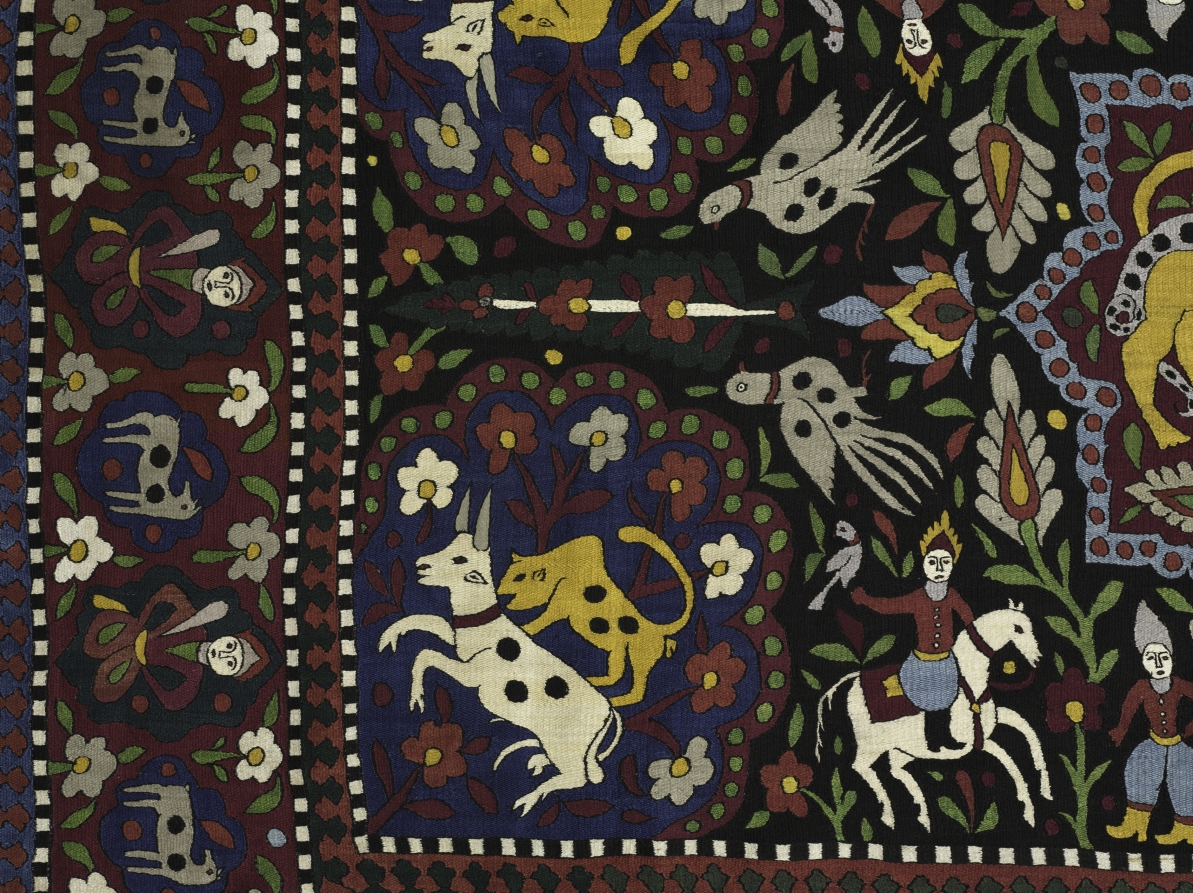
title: Ceremonial or summer floor cover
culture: Iran, Qajar period (1779-1925)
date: 1800s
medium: cotton: plain weave; silk: embroidery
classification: Embroidery